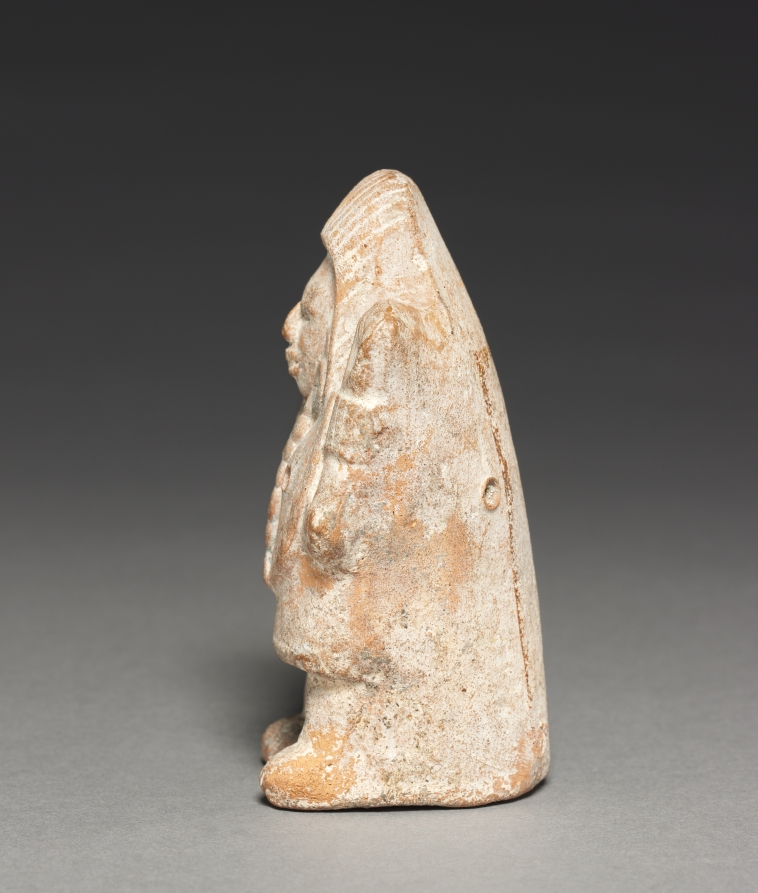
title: Female Figurine Rattle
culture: Mexico, Campeche, Jaina Island, Maya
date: 600–900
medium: Ceramic, pigment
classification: Sculpture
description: This hollow, mold-made figurine contains pellets that transform it into a rattle used as a musical instrument, perhaps during household rituals.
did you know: This hollow, mold-made figurine contains pellets that transform it into a rattle.